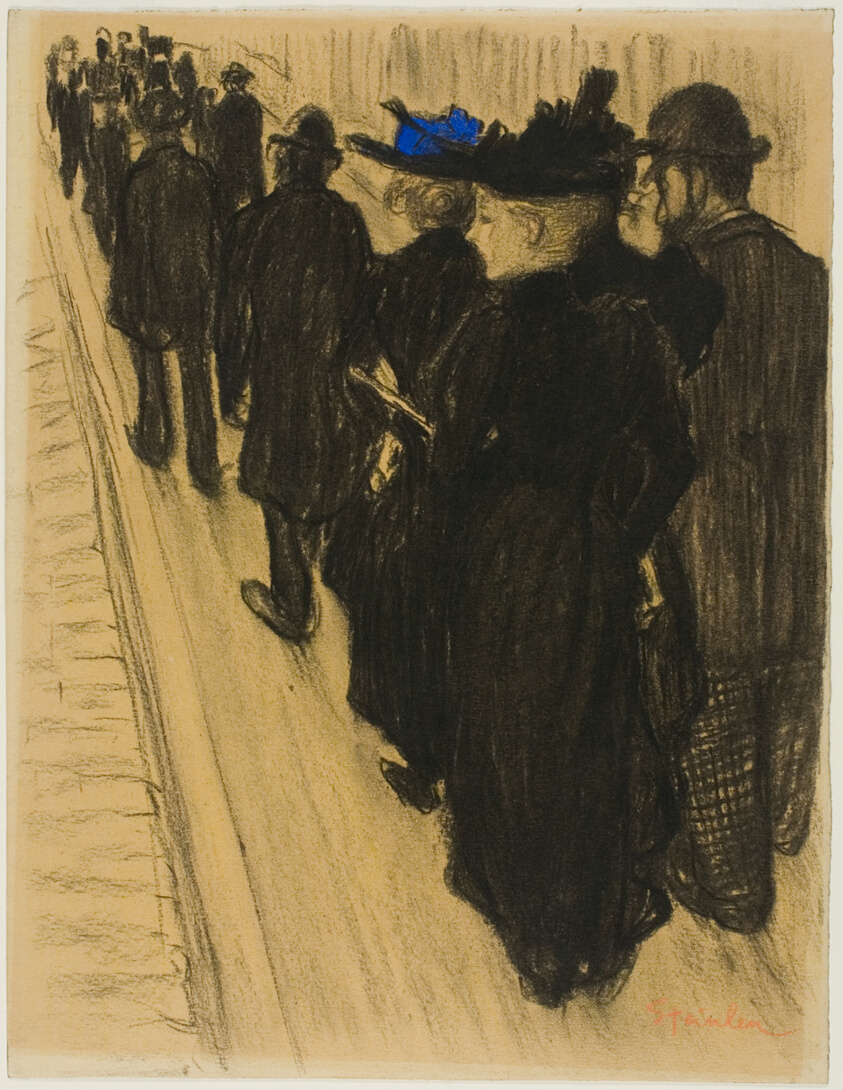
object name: Drawing and Watercolor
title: The Entourage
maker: Théophile-Alexandre Steinlen; French, born Switzerland, 1859-1923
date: 1895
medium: Charcoal with stumping, and touches of blue and yellow and pink pastel, on tan wove paper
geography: France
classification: charcoal; drawings (visual works); prints and drawing